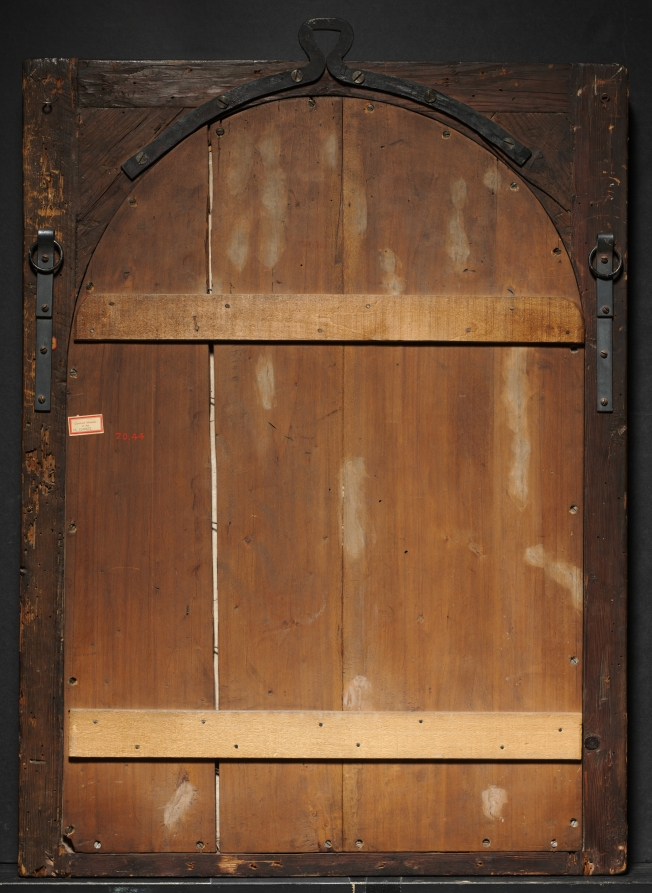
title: Madonna and Child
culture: Italy, Florence, 15th century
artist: workshop of Antonio Rossellino (Italian, 1427–1479 )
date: c. 1470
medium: painted stucco with traces of gilding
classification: Sculpture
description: This relief is one of several such painted stucco replicas cast after the marble original of about 1460–65 now in the Pierpont Morgan Library, New York. While this example has suffered old and obvious losses, it still conveys the overall composition and some of the subtlety of modeling of the marble. In addition, it retains sufficient portions of its fifteenth-century paint and gilding to suggest a colorfulness and richly decorated surface which the marble was never intended to have, and which connects this work with panel paintings of the time. The gilded wooden frame, not made for this relief, is Venetian and dates to about 1400–1450.